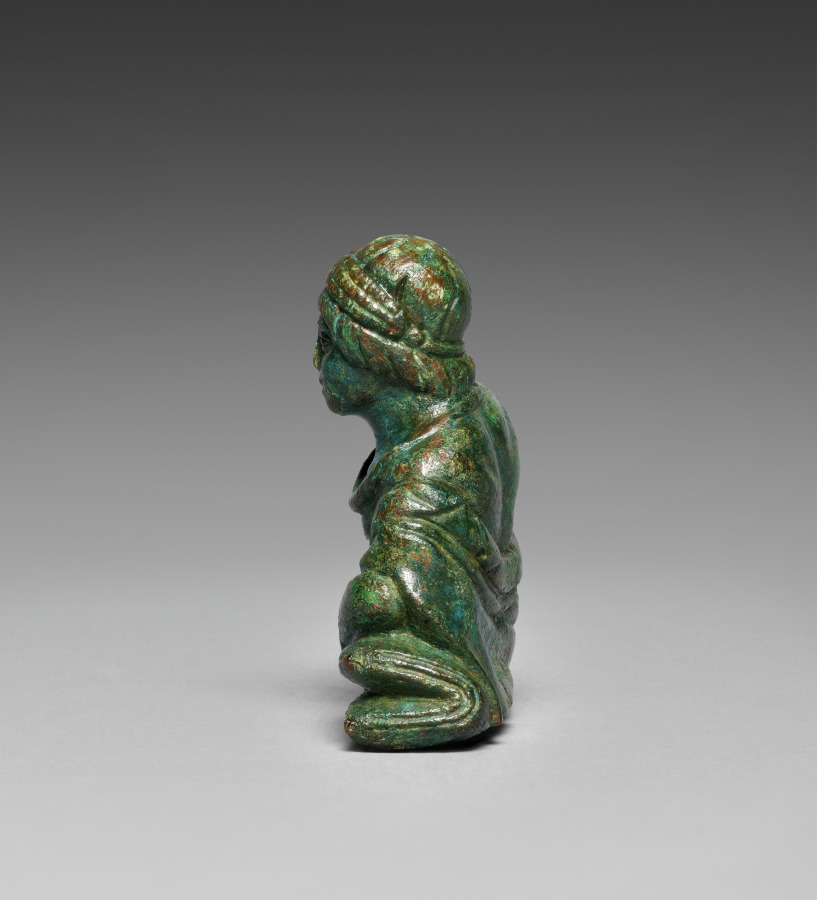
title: Vessel Ornament of Banqueter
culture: Etruscan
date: probably 400–375 BCE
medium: bronze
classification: Sculpture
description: This bronze banqueter figurine was one of six once adorning the rim of a large basin, now lost. Cast in molds with individualized details, most have grooves on their underside to attach to the basin. Minute traces of gilding remain on areas of clothing and skin (mostly visible only under magnification), suggesting that they may have been completely gilded. Two handles in the form of hippocampi, horses with serpentine tails, also belonged to the basin and are now displayed at the Michael C. Carlos Museum at Emory University. The basin may have been used to hold liquid for a banquet, or was perhaps funerary. This reclining bronze figurine’s left arm rests on the drapery covering his shoulder. His right arm is raised and broken at the wrist. Garlands rest on his head and chest. Traces of gilding remain in the garlands and drapery folds. The figurine is very similar to 1987.157, suggesting that he may have held a phiale mesomphalos, a shallow bowl used for wine libations to the gods.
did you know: Representations like this figurine suggest that Etruscan banqueters may have worn garlands made of flowers or leaves.